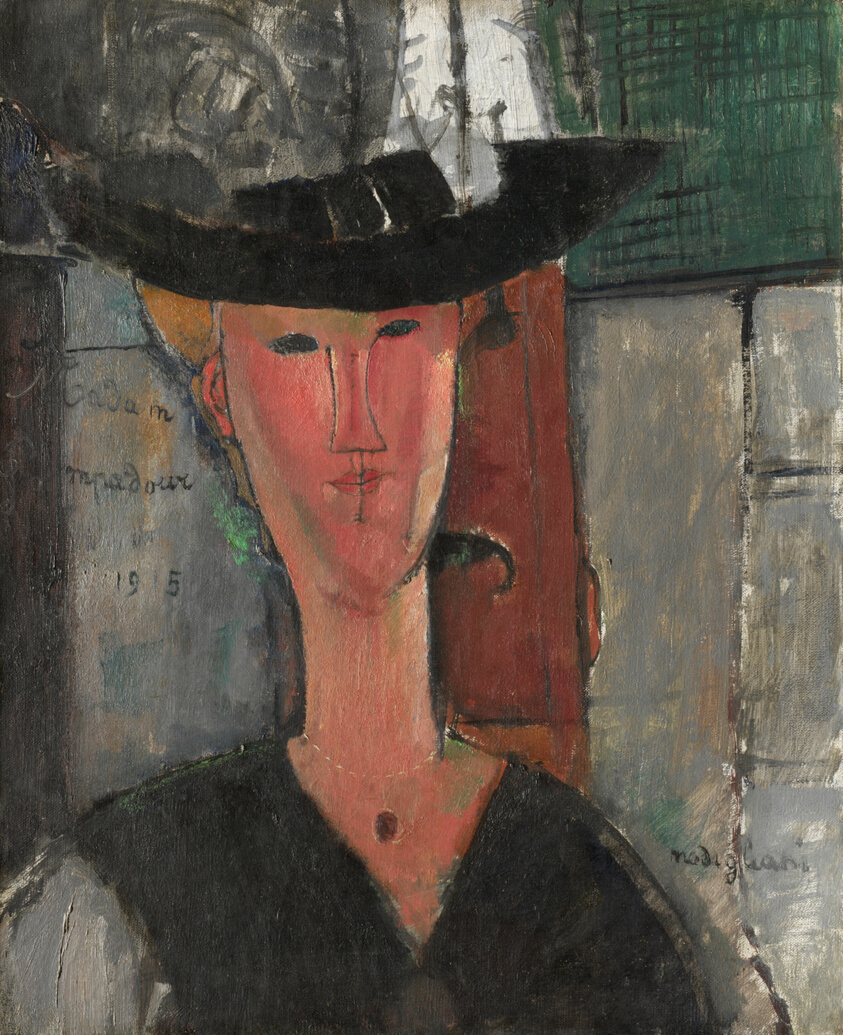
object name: Painting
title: Madam Pompadour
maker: Amedeo Modigliani (Italian, 1884–1920)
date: 1915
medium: Oil on canvas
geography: Italy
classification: oil on canvas; painting; modern and contemporary art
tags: women, interiors, portraits, fashion, hats, Joseph Winterbotham Collection